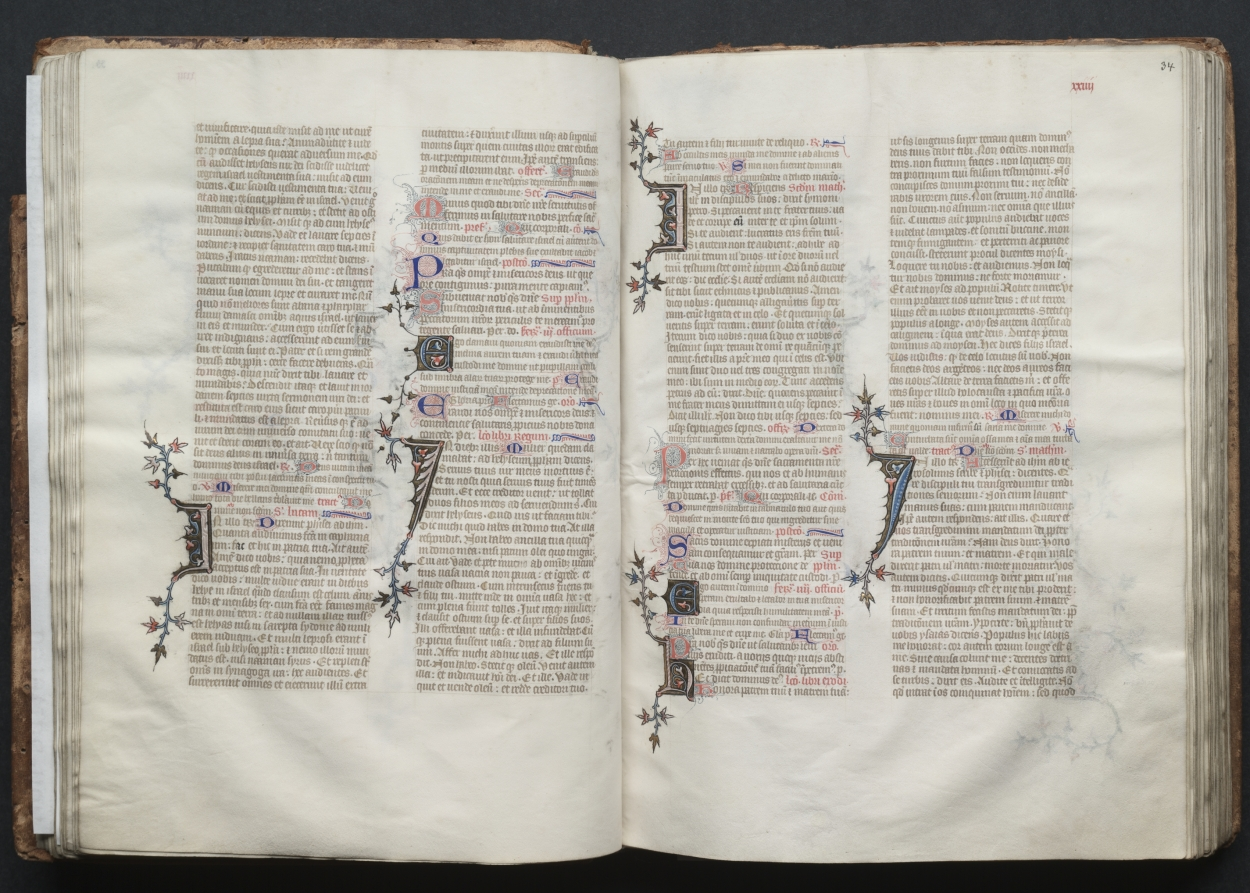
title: The Gotha Missal: Fol. 34r, Text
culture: France, Paris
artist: Master of the Boqueteaux (French)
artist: and Workshop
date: c. 1375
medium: ink, tempera, and gold on vellum; blind-tooled leather binding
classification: Bound Volume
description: The style and quality of this manuscript's decoration is typical of deluxe Parisian books made for aristocratic or royal patrons. Most of the book's decoration appears to be the work of the Master of the Boqueteaux, an artist active at the court of King Charles V (died 1380). His style was apparently shared by a number of book illuminators working in and around Paris. It is very possible that the Gotha Missal belonged to Charles V, but is not provable because the manuscript has no royal portraits and lacks a colophon. Given the book's magnificent decoration, however, it would seem that it was produced for a Valois prince, if not for the king himself. The manuscript receives its name from the German dukes of Gotha, its later owners.